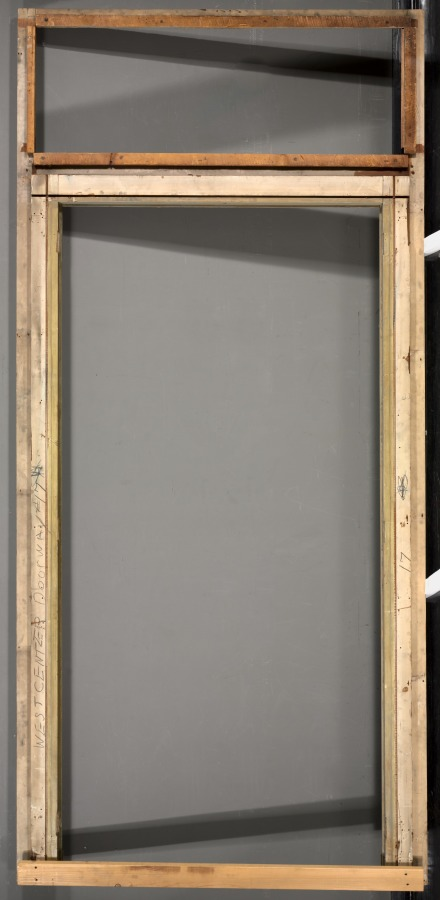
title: Double-leaf Doors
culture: France, 18th century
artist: Pierre Rousseau (French, 1751–1829)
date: 1790s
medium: oil on wood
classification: Painting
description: Shifts in style and taste often result in changes to original architectural details. Rousseau painted these doors with imitation dark wood grain. Another craftsman later scraped off the dark color surrounding the classical designs. This set was conserved in 1979 and retains more traces of the original graining than the other doors by this artist in the museum's collection.